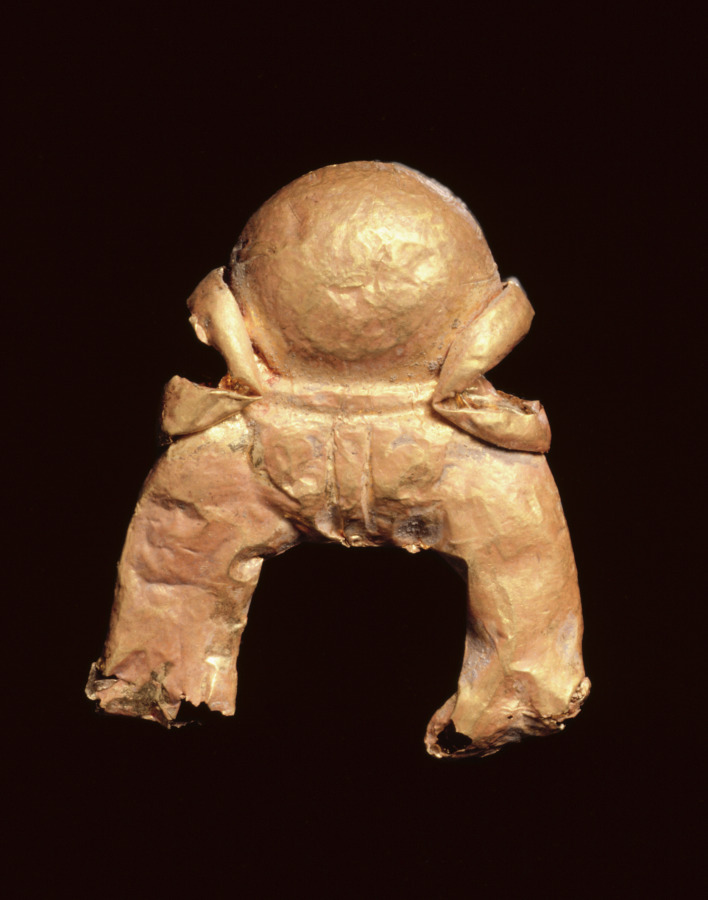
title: Gold Piece in Shape of Triratna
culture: India, Shunga period (185–78 BCE)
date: 185–72 BCE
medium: gold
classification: Jewelry